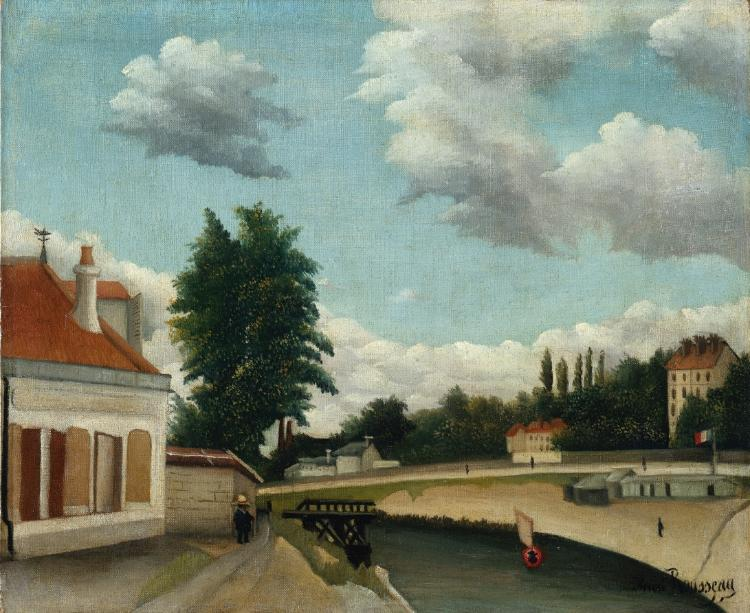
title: Outskirts of Paris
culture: France, late 19th Century-early 20th Century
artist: Henri Rousseau (French, 1844–1910)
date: c. 1897–1905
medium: oil on fabric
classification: Painting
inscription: Signed lower right: Henri Rousseau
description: In addition to his large jungle scenes, Rousseau also painted small landscapes, including this view of a river or canal on the outskirts of Paris. While retaining a sharp, detailed rendering of objects, Rousseau has abandoned the flat tonality of his earlier works for more blended modeling and freer brushwork. The volumes of the clouds, trees, and houses occupy distinct areas in space, revealing the serenity of an organized world. A self-taught painter who, at the age of 41, quit his job in the Paris municipal toll or tax service to devote himself entirely to art, Rousseau was widely admired by avant-garde artists for his intuitive sense of design and inventive subjects.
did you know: Rousseau once said to Picasso: "We are the two greatest artists of this era, you in the Egyptian style, I in the modern style."